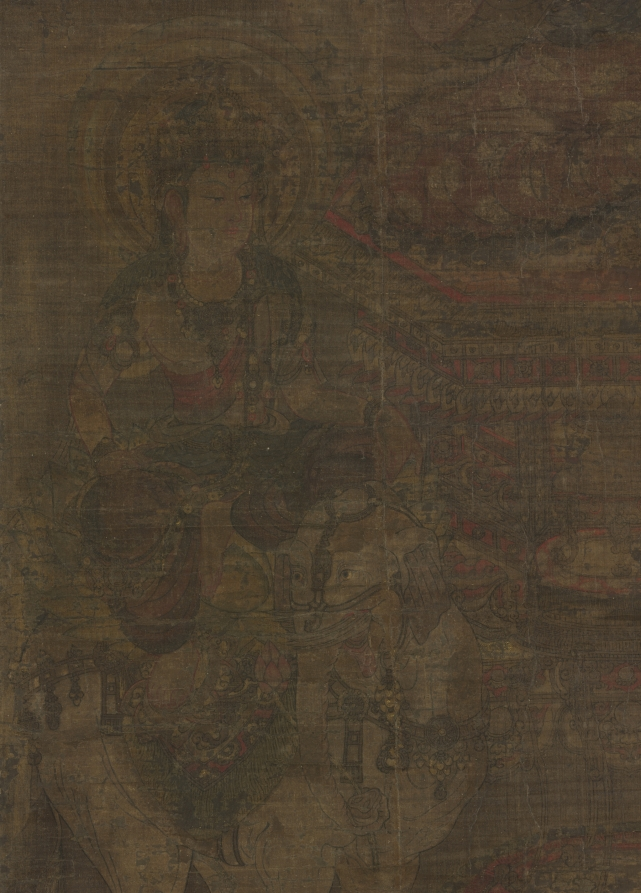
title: Shakyamuni Triad: Buddha Attended by Manjushri and Samantabhadra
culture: China, Tang dynasty (618-907)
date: c. 900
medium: Hanging scroll; ink and color on silk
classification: Painting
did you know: Samantabhadra rides a six-tusked white elephant, while Manjusri is seated upon a lion.